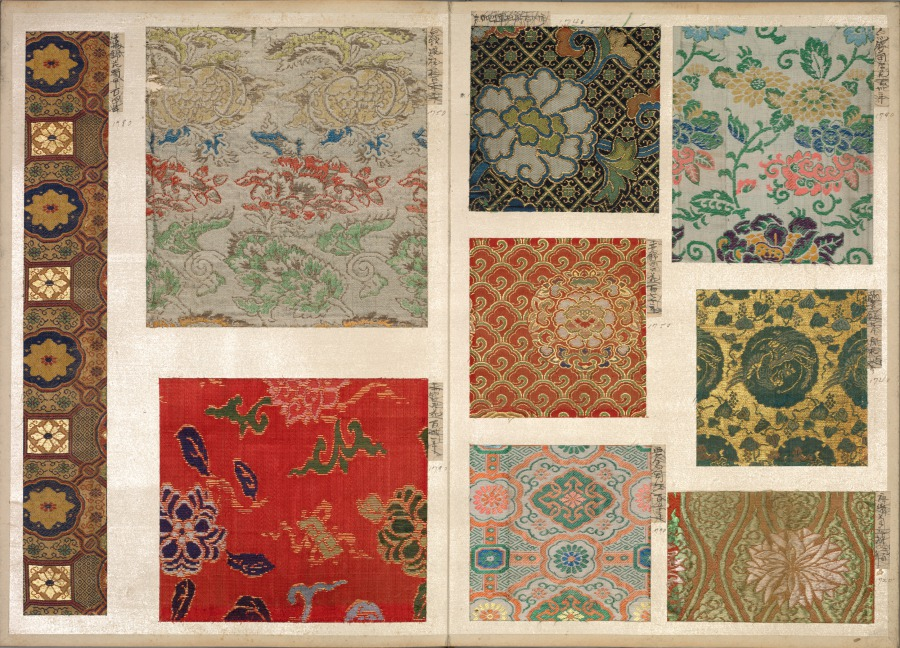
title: Album of Textile Samples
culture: Japan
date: 1790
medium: silk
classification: Textile